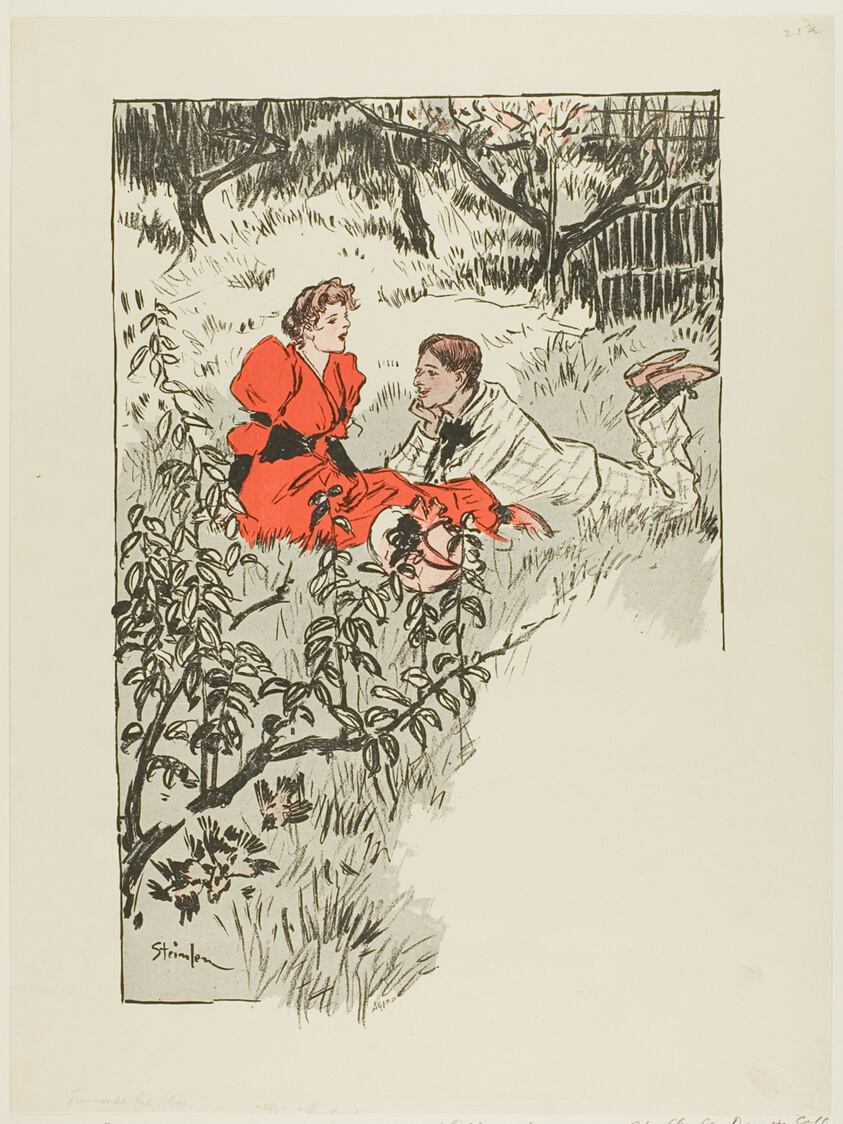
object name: Print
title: Spring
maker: Théophile-Alexandre Steinlen; French, born Switzerland, 1859-1923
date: published April 16, 1893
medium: Photorelief print in red and black on ivory wove paper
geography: France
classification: photorelief; print; prints and drawing